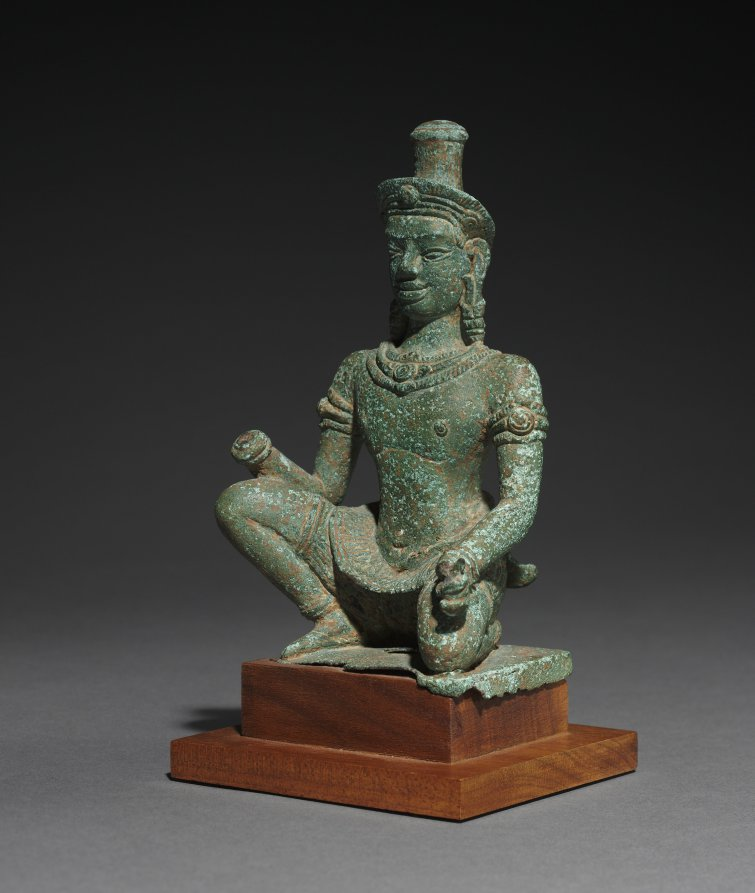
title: Kneeling Worshipper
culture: Cambodia, Angkor Wat style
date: 1100s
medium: bronze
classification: Sculpture